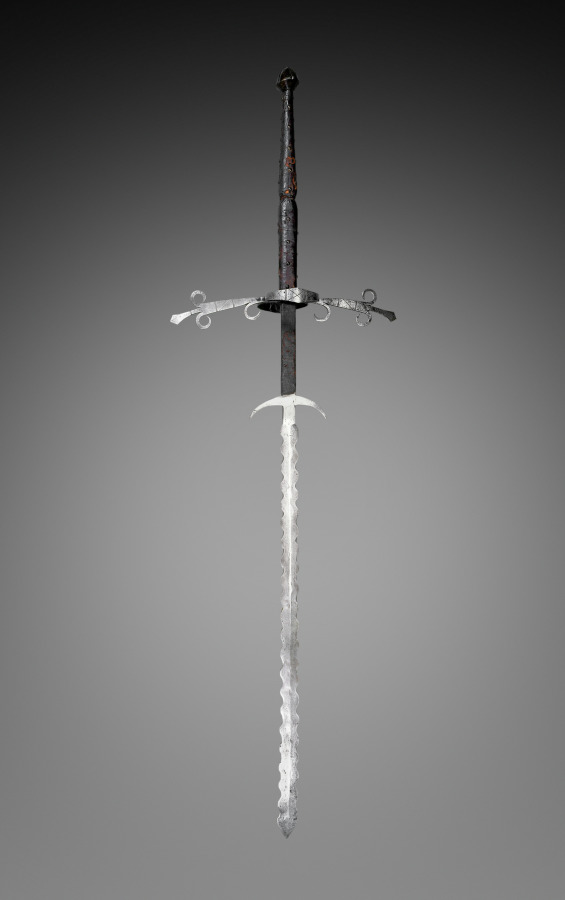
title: Two-Handed Sword with Flamboyant Blade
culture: Germany, second half 16th Century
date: 1550–1600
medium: steel, leather and wood grip with brass rivets; bronze pommel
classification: Arms and Armor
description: The two-handed sword, originally a weapon of war for specialist infantry, is so named because two hands were required to wield it. By the late 1600s, these enormous swords assumed a largely ceremonial or bodyguard function.